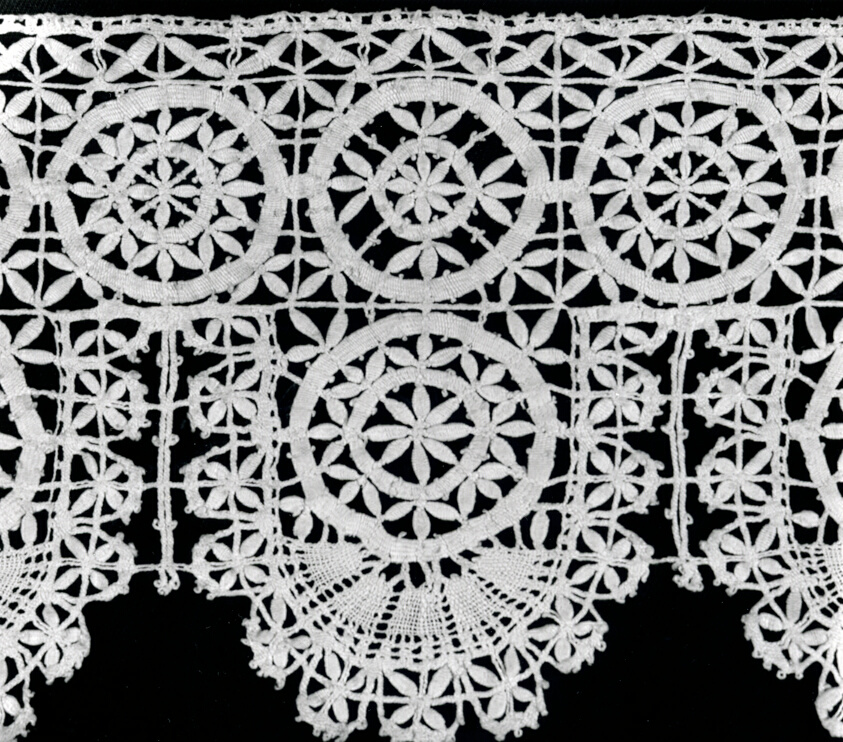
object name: Textile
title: Five Borders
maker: Italy, Genoa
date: 1620/40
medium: Linen, bobbin straight lace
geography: Italy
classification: textile; lace - bobbin